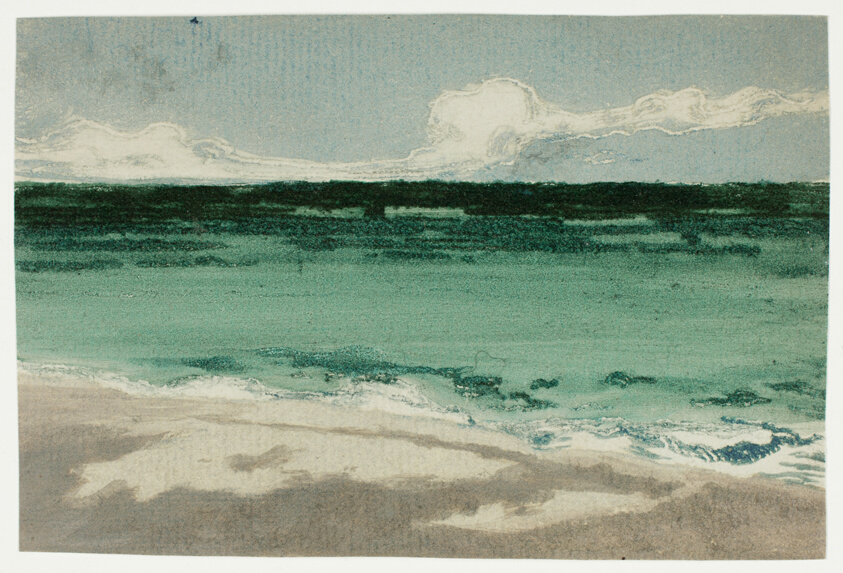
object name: Print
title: The Sea at Bognor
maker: Theodore Roussel (French, worked in England, 1847-1926)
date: 1895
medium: Color soft ground etching, inked à la poupée, with inkless intaglio on ivory laid paper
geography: France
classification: print; prints and drawing